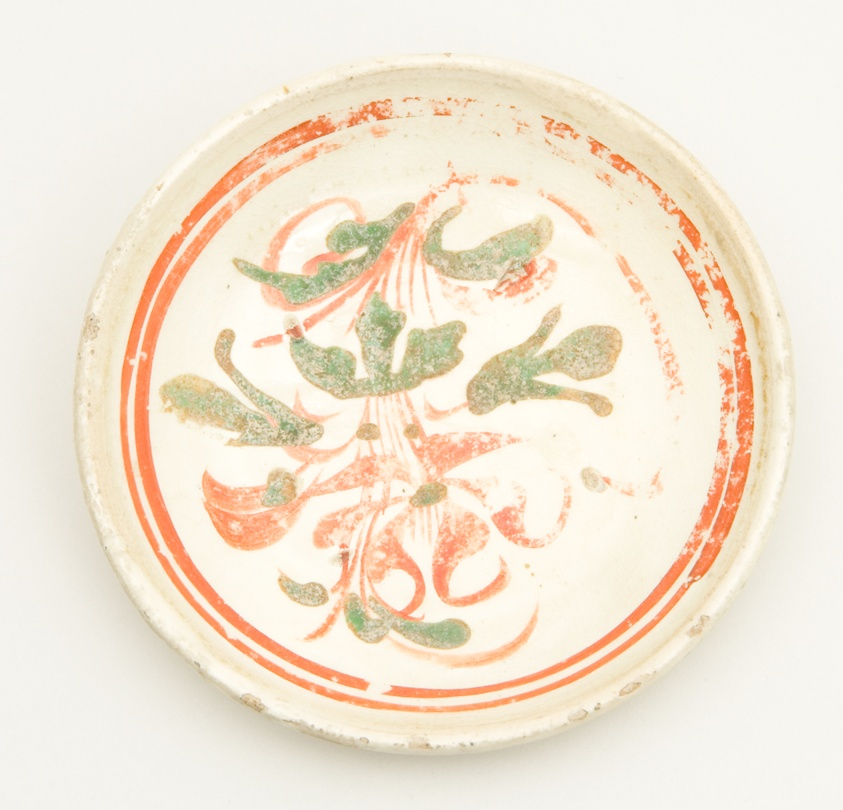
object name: Vessel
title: Bowl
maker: China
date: Jin dynasty (1115–1234), c. 13th century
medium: Cizhou ware, stoneware painted with white slip, iron-brown slip, and overglaze enamels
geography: China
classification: vessel